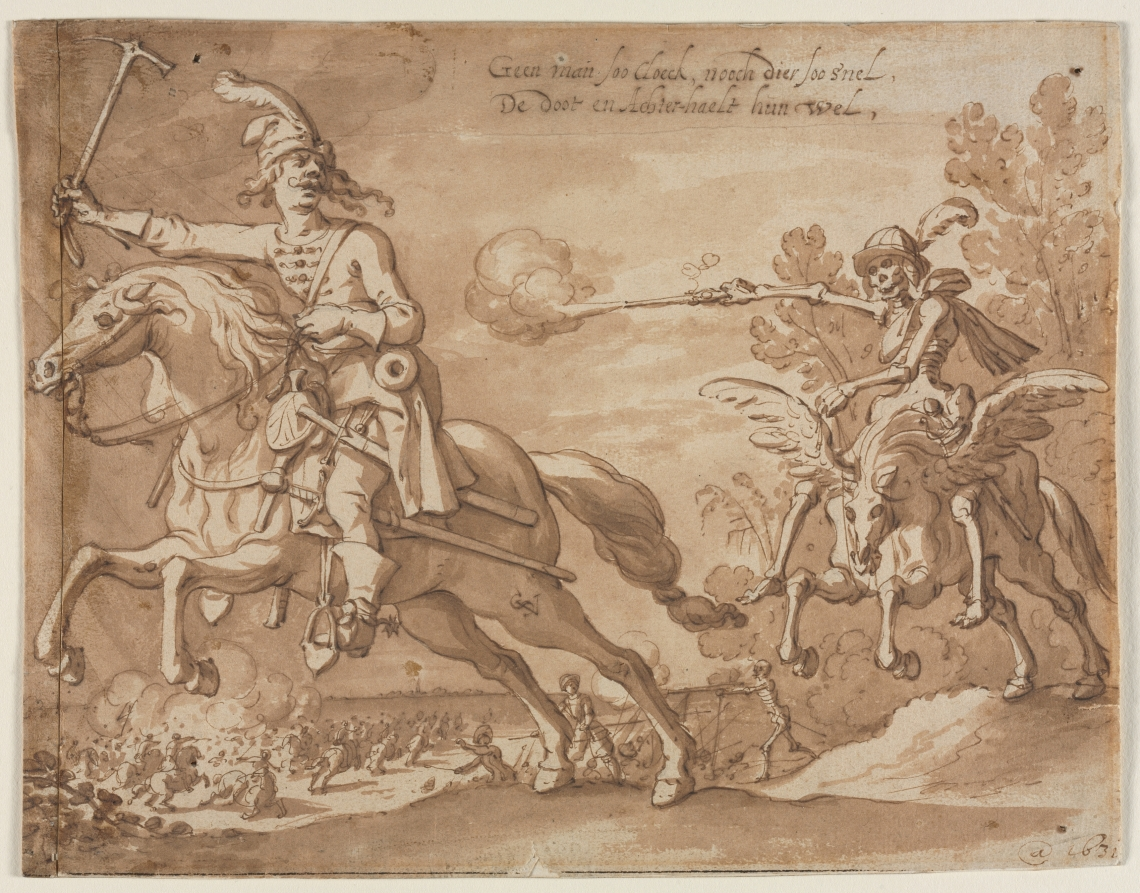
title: Death on Horseback Chasing a Flying Knight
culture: Flanders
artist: Sebastian Vrancx (Flemish, 1573–1647)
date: 1631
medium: pen and brown ink and brush and brown wash, over traces of graphite; framing lines in brown ink (bottom edge)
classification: Drawing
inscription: signed, lower center, in brown ink: [artist's monogram: SV] ; by artist, lower right, in brown ink: @ 1631 ; upper center, in brown ink: Geen man soo cloeck, nooch dier soo snel / De doot en Achter-haelt hun wel, [= No man [is] so clever, nor animal so swift/ Death overtakes them all] ; VERSO OF SECONDARY SUPPORT, upper center, in graphite: Bought at Vienna / 1817 ; center, in graphite: Sebastian Vrancx ; lower right, in graphite: 10 1/8 x 12 3/8 / 15 5/8 x 17 3/8